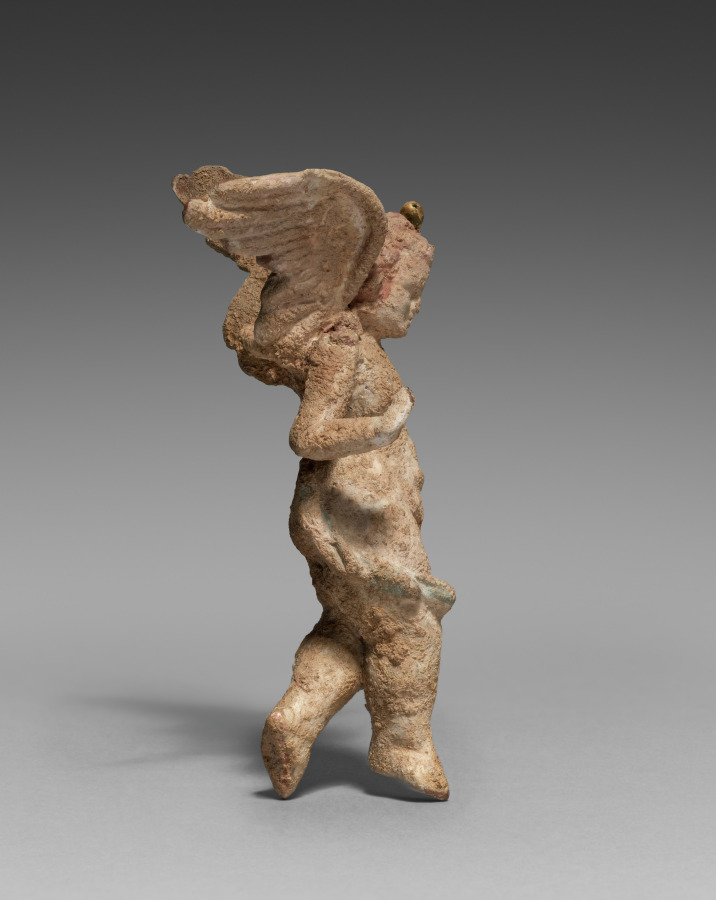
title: Figurine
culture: Greece, Myrina, Hellenistic period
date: late 400s–300s BCE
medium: terracotta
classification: Sculpture